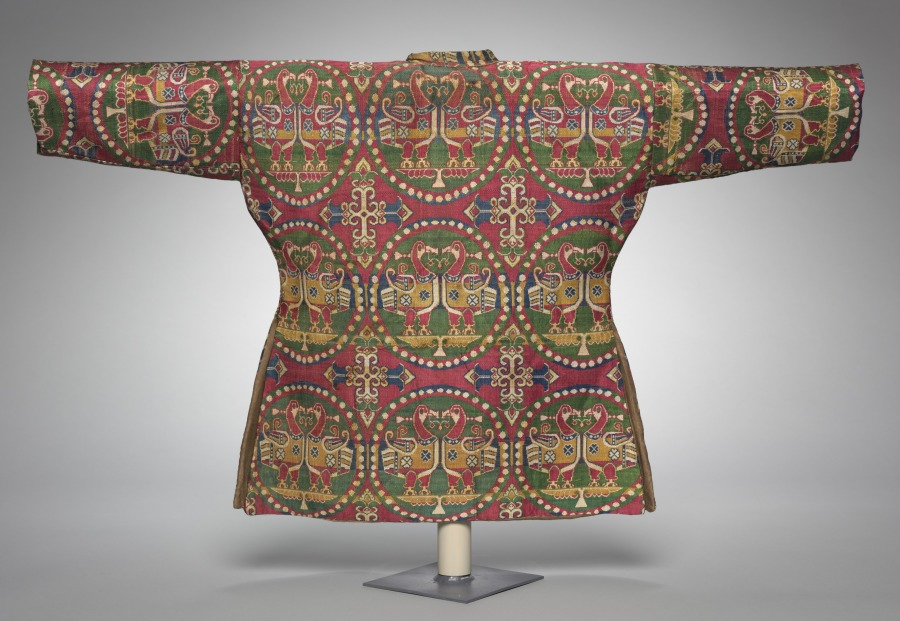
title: Child’s Coat with Ducks in Pearl Medallions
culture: Probably Sogdia (present-day Uzbekistan); China, Tang dynasty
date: 700s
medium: Silk: weft-faced compound twill weave (samite)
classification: Garment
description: The coat’s outer fabric is woven in five brilliant colors featuring paired ducks in pearl roundels, hallmarks of the precious and highly desired silks from Sogdia. The coat’s inner lining is a twill damask with a floral pattern made in China. The combination of Sogdian and Chinese silks in one garment with Tibetan ownership history is evidence of the vital exchange and cultural interaction among the peoples living along the trade routes of the Silk Road. This precious coat was presumably made for a Tibetan prince. Given the coat’s pristine condition, though, it is unclear whether the garment was ever worn, or was used as a diplomatic gift or perhaps as currency.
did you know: This coat is part of a set of garments that originally included an outer pair of pants and silk boots made from the same fabric.